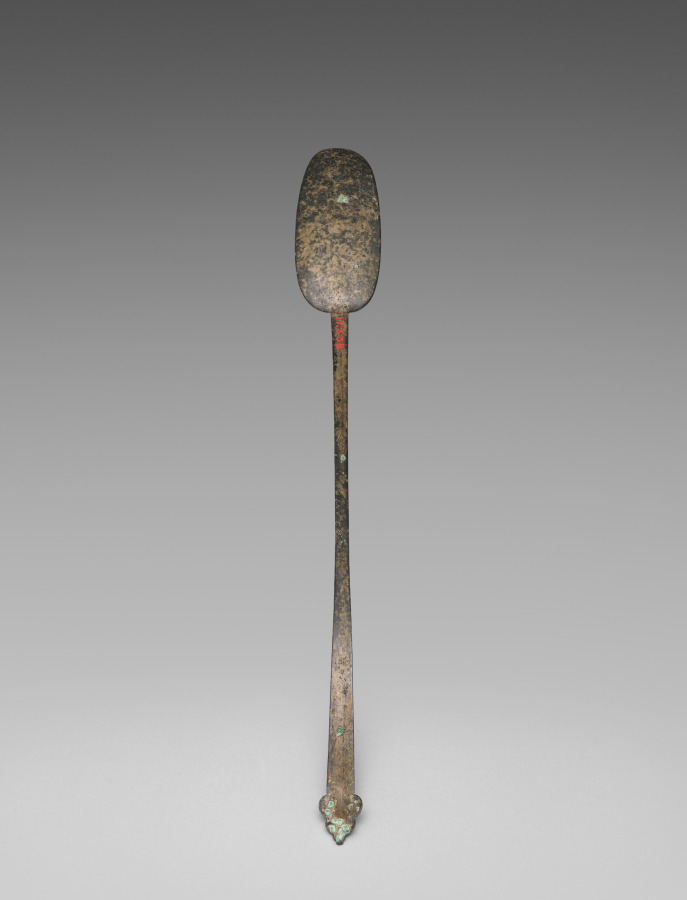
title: Spoon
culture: Korea, Goryeo dynasty (918–1392)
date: 918–1392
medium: silver bronze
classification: Metalwork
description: Celadons, spoons, seals, and bronze mirrors were among the most common burial objects of the Goryeo dynasty (918–1392), placed in tombs to honor and comfort the deceased. This spoon, with its gracefully curved bowl and handle that bends downward to each side, ending in a scepter-shaped finial, is distinctive in design and was likely used in Buddhist rituals, rather than as an everyday utensil.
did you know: Scholars have proposed that toward the end of the 1300s, Koreans enjoyed meat-based soups more than any other dishes, explaining why spoons became common household items as well as burial goods.